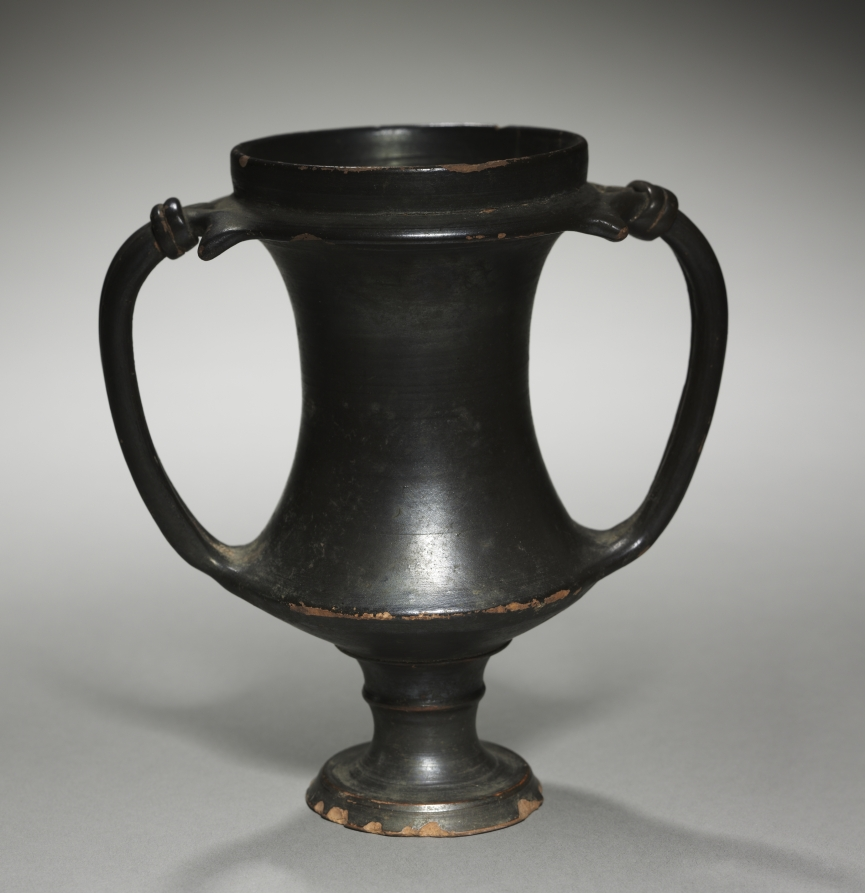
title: Black-Gloss Kantharos or Karchesion (Drinking Cup)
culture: Etruscan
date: 400–200 BCE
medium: ceramic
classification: Ceramic